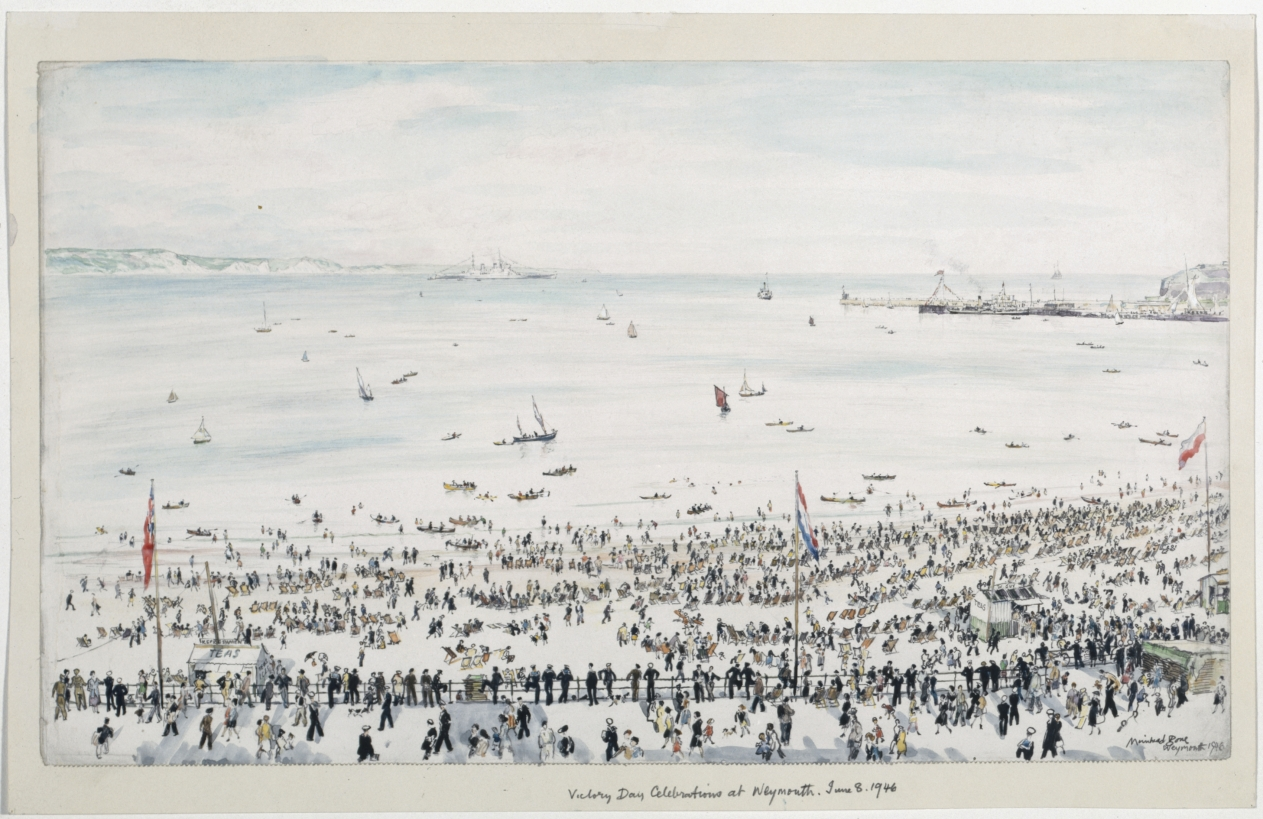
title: Weymouth Bay, Victory Day Celebrations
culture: England, 20th century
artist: Muirhead Bone (British, 1876–1953)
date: 1946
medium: watercolor, graphite, pen and ink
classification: Drawing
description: Hundreds of British beachgoers in Weymouth Bay celebrate the first anniversary of Victory Day, marking the Allies' victory against Germany in May 1945. This colorful depiction highlights the electrified mood of the population. Sir Muirhead Bone served as the official war artist during World War II. Having been appointed in 1916, Bone captured this happy moment after having lived through two world wars.